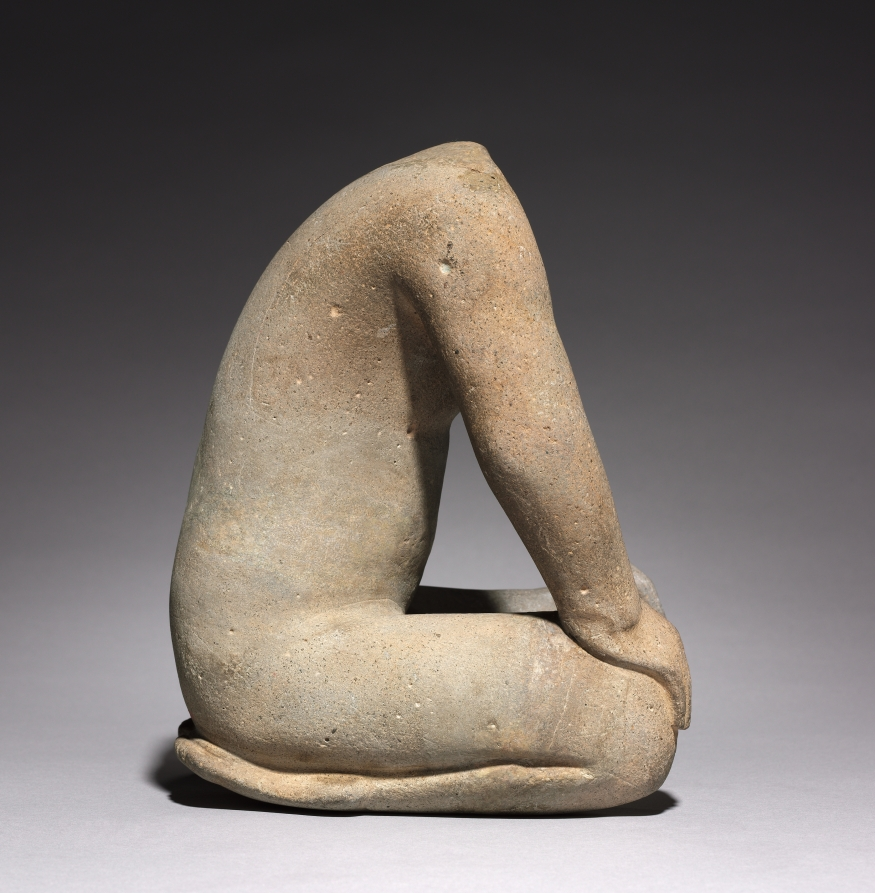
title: Kneeling Figure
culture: Mexico, Guerrero, Olmec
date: c. 1200–600 BCE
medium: stone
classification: Sculpture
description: Outside of the Maya, Olmec sculptures of humans have a naturalism unknown in other Mesoamerican artistic traditions. On this finely carved figure, the musculature of the arms, torso, and legs is carefully depicted, and even the fingernails and toenails and are shown.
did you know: An observant traveler discovered the left knee and hand fragment, orginally missing and now reunited.